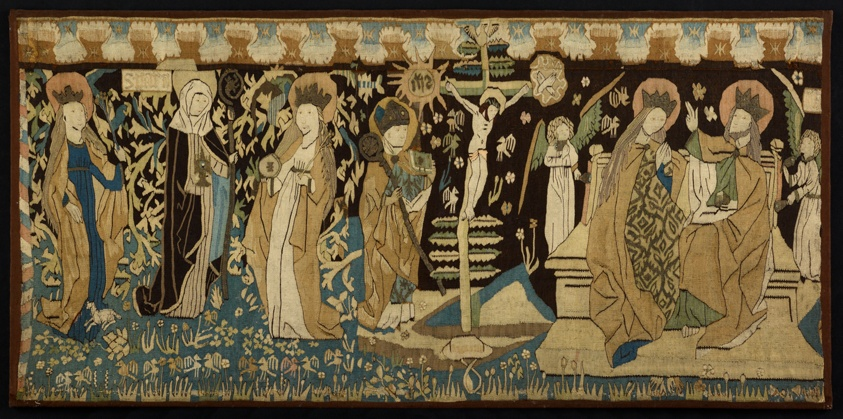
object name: Religious/Ritual Object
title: Altar Frontal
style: medieval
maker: Germany, probably Middle Rhine region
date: c. 1450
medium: Linen, wool, and gilt- and silvered-metal-strip-wrapped silk, slit and dovetailed tapestry weave; embroidered with silk in back and split stitches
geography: Germany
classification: weaving - tapestry; textile; ritual objects